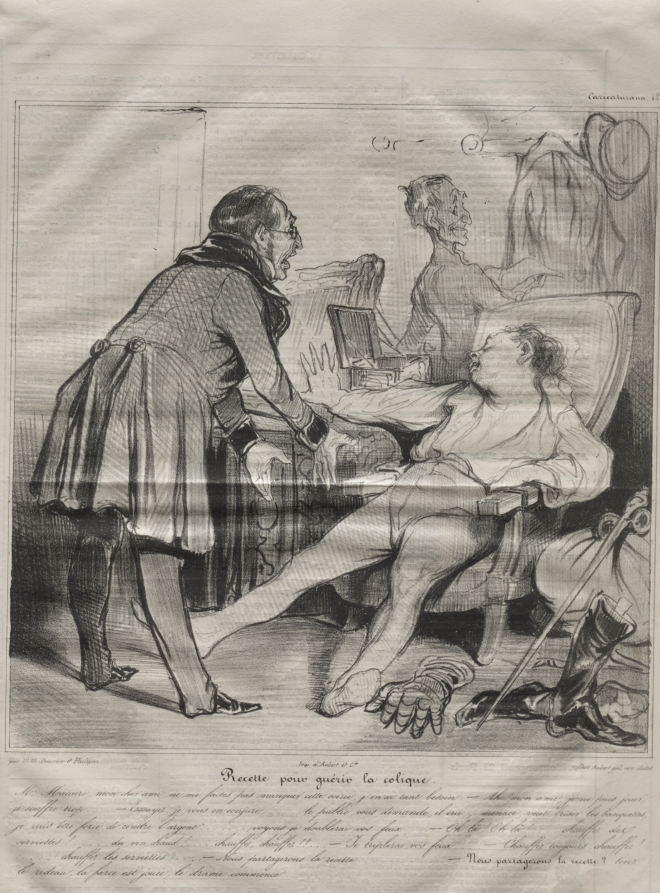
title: Recipe to Cure Colic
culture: France, 19th century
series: Caricaturana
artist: Honoré Daumier (French, 1808–1879)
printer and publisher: Aubert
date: 1838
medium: lithograph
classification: Print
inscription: Lower margin, printed: par M. M. Daumier et Philipon / Imp. d'Aubert et Cie. / Chez Aubert gal véro dodat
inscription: Above image, printed: Caricaturana; 72; Below image, printed: Recette pour guérir la colique. / Mr. Macaire, mon cher ami, ne me faites pas manquer cette soirée, j'en ai tant besoin. - Ah! mon ami je ne puis jouer, / je souffre trop..... -Essayez, je vous en conjure..... le public vous demande, il crie, mencace, veut briser les banquettes, / je vais être forcé de rendre l'argent....... voyons je doublerai vos feux.... - Oh la! Oh là!..... chauffez des / serviettes!..... du vin chaud!..... chauffez, chauffez!!! ... - Je triplerai vos feux.... - Chauffez toujours, chauffez! / ......chauffez les serviettes..... - Nous partagerons la recette.......... - Nous partagerons la recette? levez / le rideau, la farce est jouée, le drame commence.........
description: This print was published in Le Charivari (January 14, 1838) as plate 72 from the series Caricaturana.